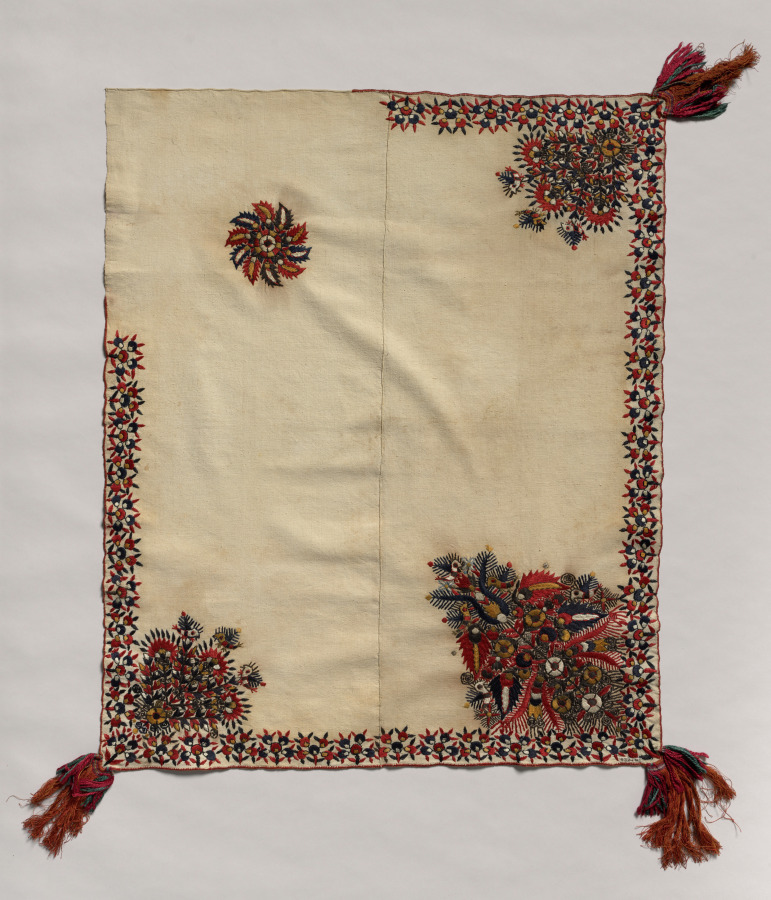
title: Furnishing textile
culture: Africa, North Africa, Algeria, Algerian embroiderer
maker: Algerian Embroiderer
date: 1800s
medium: Linen, silk, dye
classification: Embroidery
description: This textile is woven using undyed linen in a technique called a tabby weave. The artist then used red, blue, white, and ochre yellow silk threads to create embroidered floral borders and designs in each corner, topped with several birds. The style of these motifs also strongly resembles Turkish embroideries made in this period.